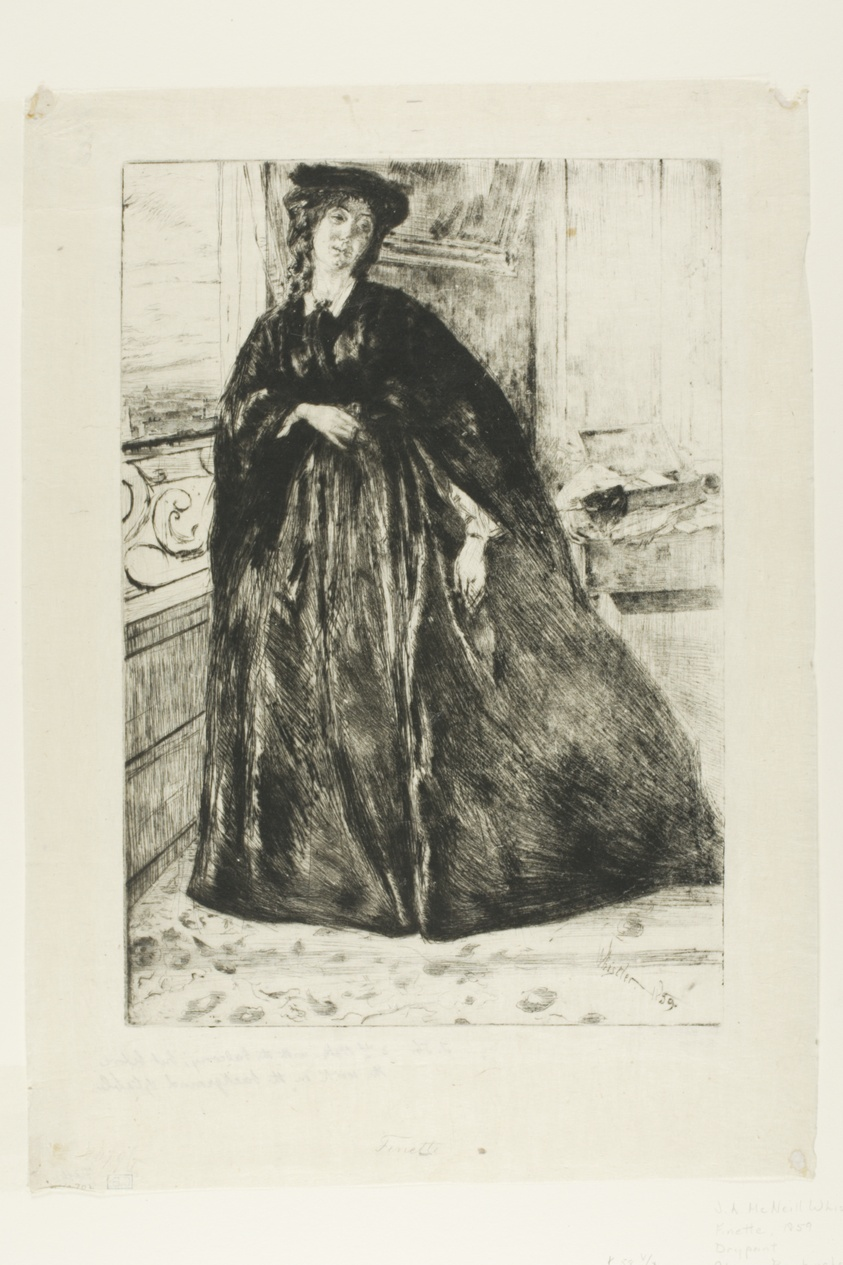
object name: Print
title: Finette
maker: James McNeill Whistler (American, 1834-1903)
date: 1859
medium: Etching and drypoint in black on ivory Japanese paper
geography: United States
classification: etching; foul biting; drypoint; print; prints and drawing; paper